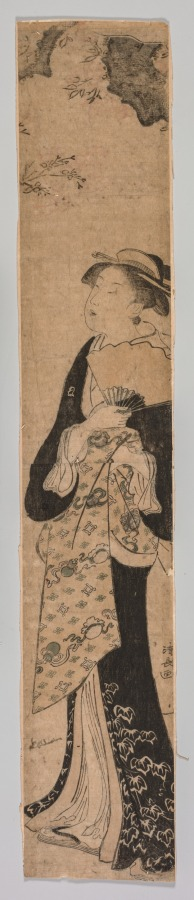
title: A Beauty in Spring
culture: Japan, Edo period (1615–1868)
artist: after Torii Kiyonaga (Japanese, 1752–1815)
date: 1752–1815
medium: color woodblock print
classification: Print